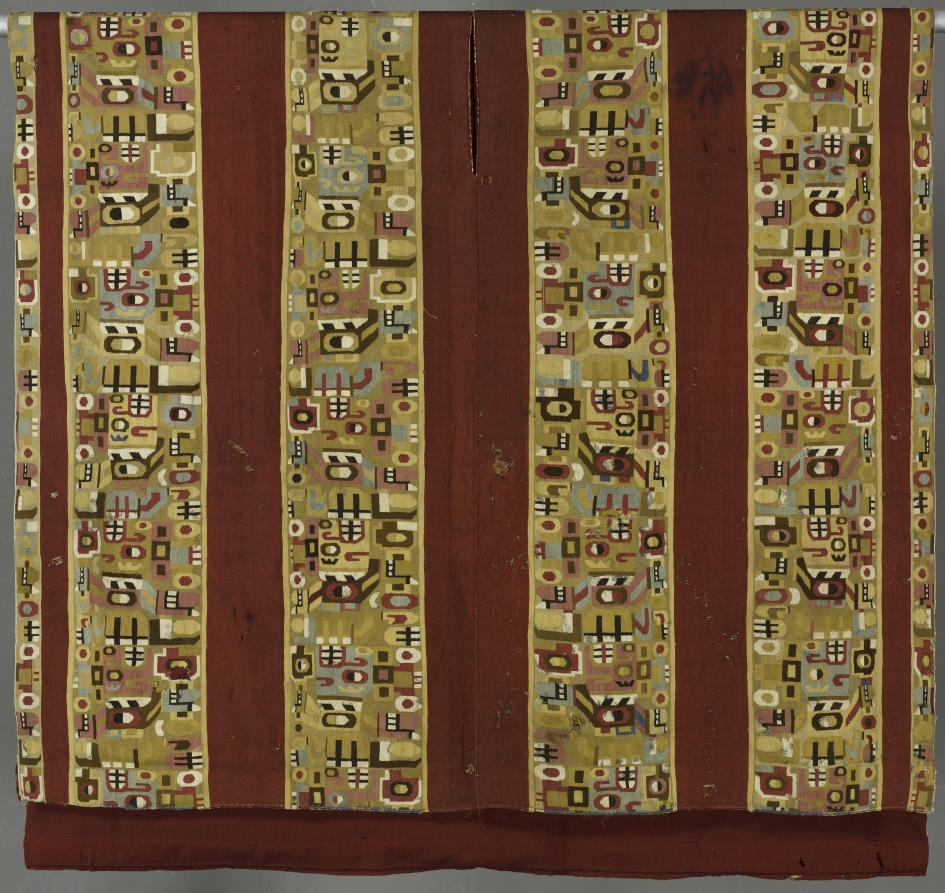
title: Tunic with Sacrificer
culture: South America, Peru, Central Andes, Middle Horizon, Wari people, 7th-11th century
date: 600–1000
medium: camelid-fiber, cotton; tapestry weave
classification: Textile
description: An extremely abstract supernatural sacrifice repeats in different colors and orientations across the body of this tunic, which was shortened on one side in antiquity. Look for the toothy black-and-white mouth in the sacrificer's upward-gazing head; other facial features include a button nose and a vertically divided eye. The figure holds the L-shaped haft of an axe behind its back and, at the front of its body, a short staff with a severed, upside-down human head on the top.